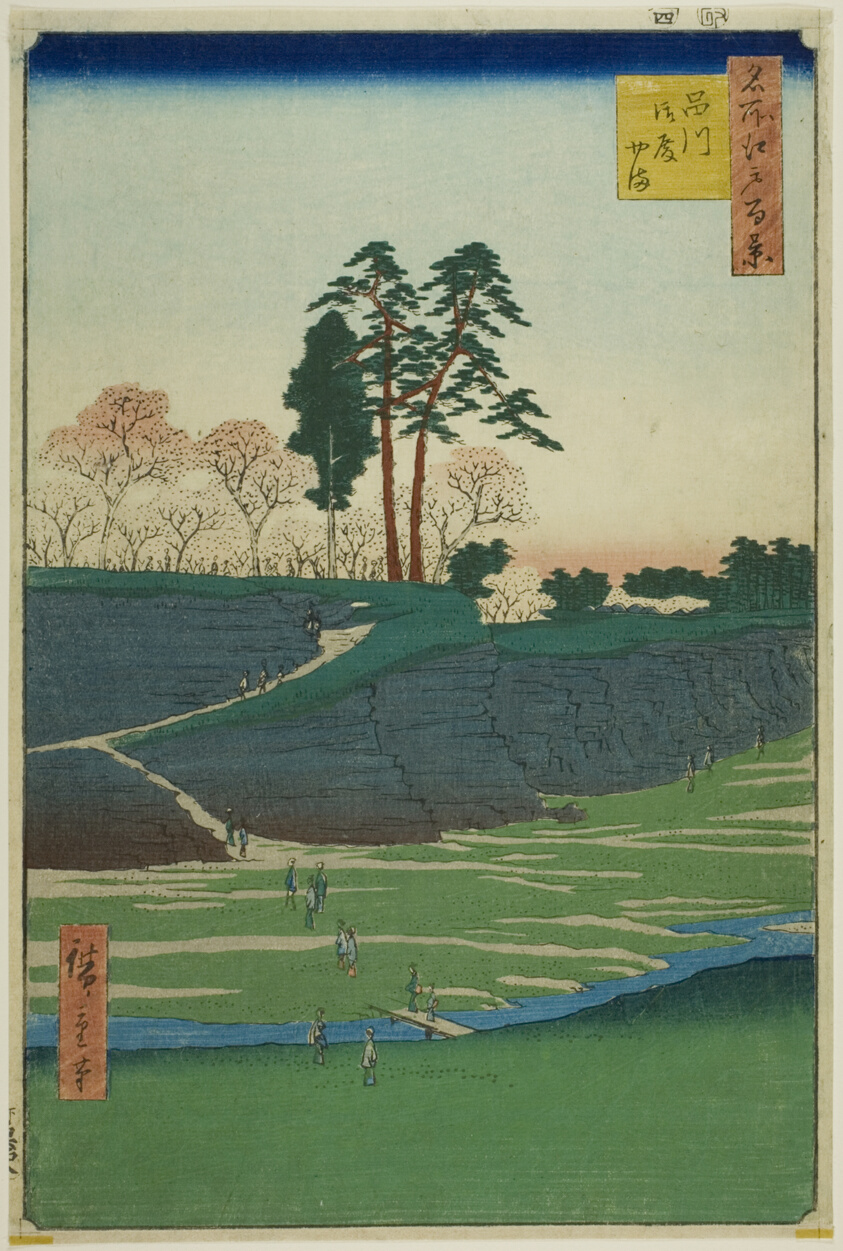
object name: Print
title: Goten Hill at Shinagawa (Shinagawa Gotenyama), from the series "One Hundred Famous Views of Edo (Meisho Edo hyakkei)"v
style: Japanese (culture or style)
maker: Utagawa Hiroshige 歌川 広重; Japanese, 1797–1858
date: 1856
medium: Color woodblock print; oban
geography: Japan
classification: woodblock print; print